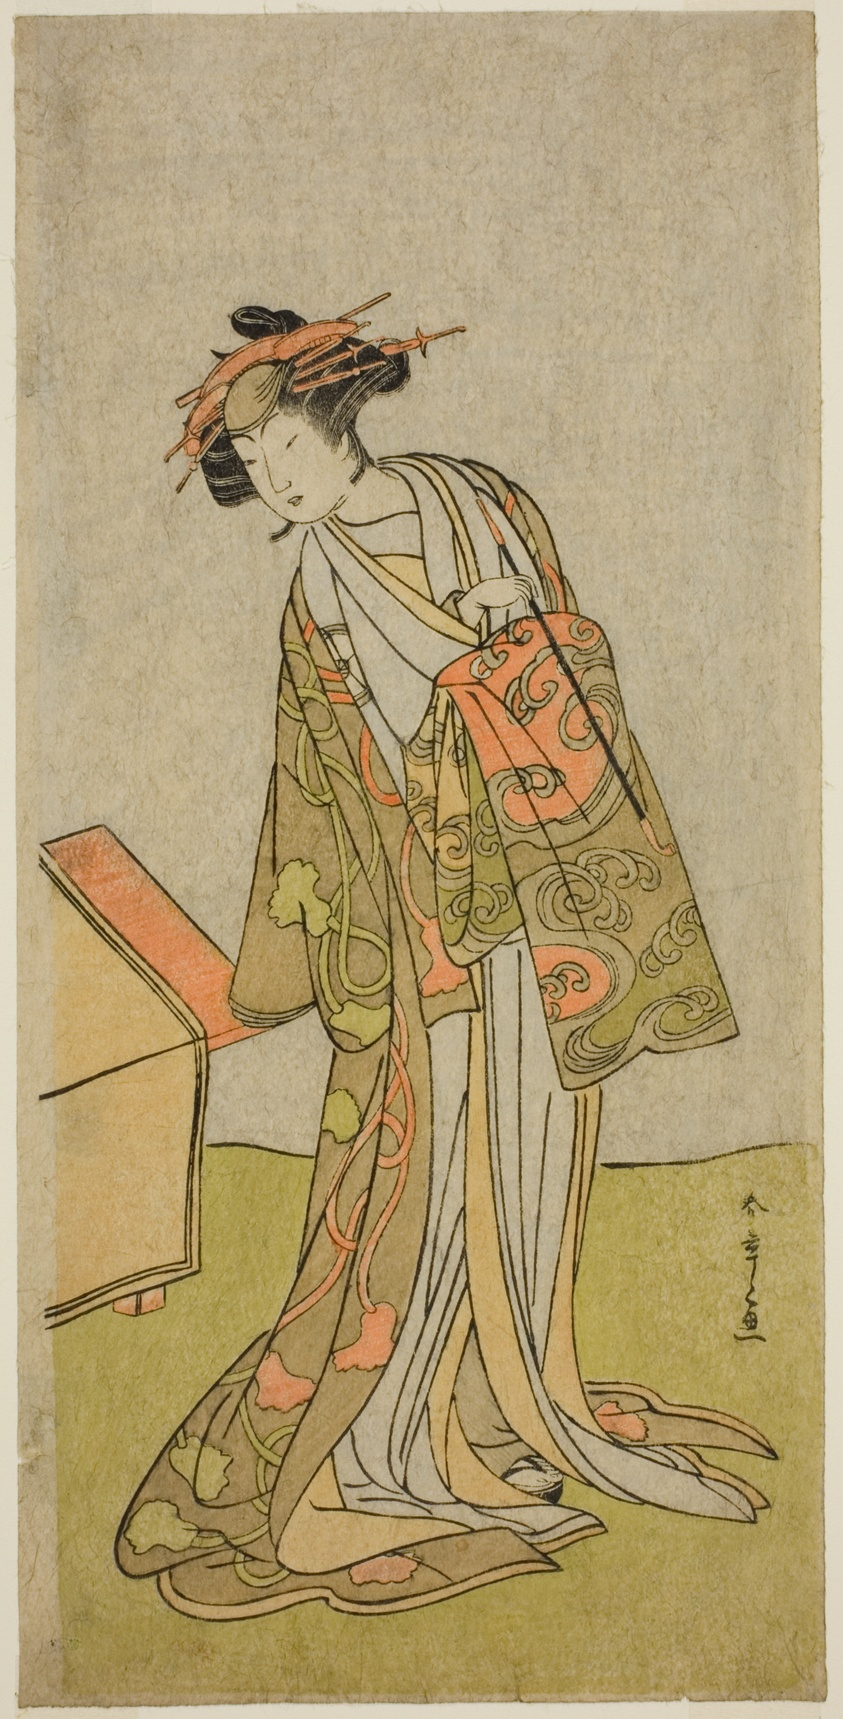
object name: Print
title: The Actor Iwai Hanshiro IV as the courtesan Agemaki in the play "Sukeroku Yukari no Hatsu-zakura," performed at the Ichimura Theater in the third month, 1776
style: Japanese (culture or style)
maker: Katsukawa Shunsho 勝川 春章; Japanese, 1726-1792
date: c. 1776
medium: Color woodblock print; center sheet of hosoban triptych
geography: Japan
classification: woodblock print; print; asian art